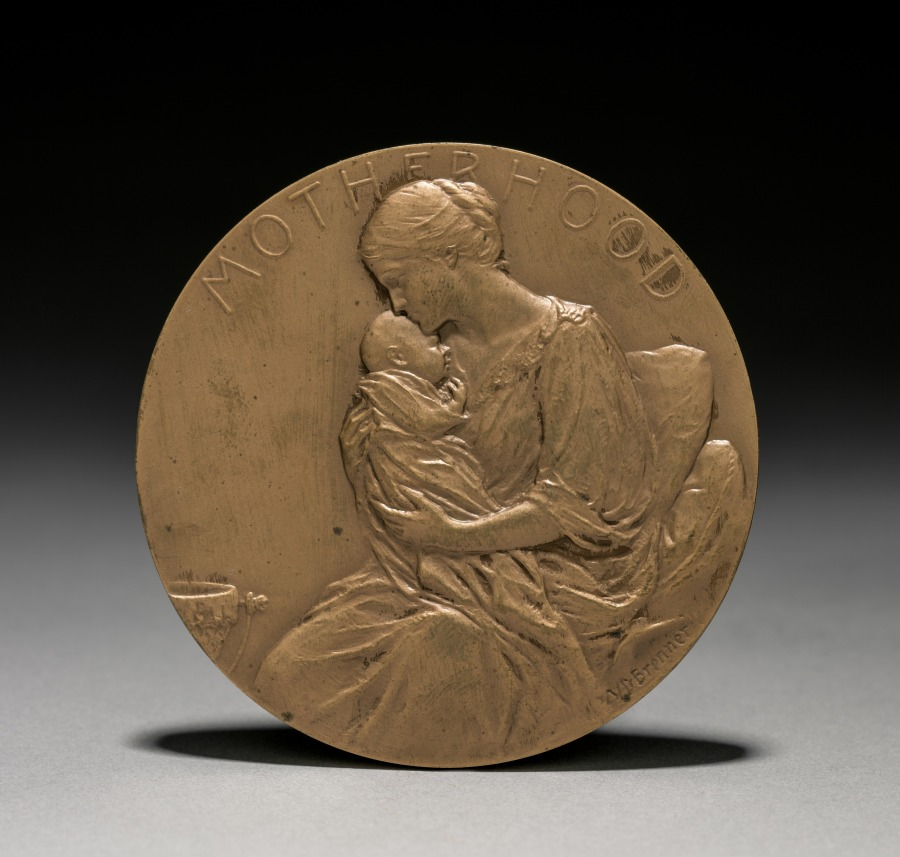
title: Medal: Motherhood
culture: America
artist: Victor D. Brenner (American, 1871–1924)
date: 1911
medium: bronze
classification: Metalwork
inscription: above: "MOTHERHOOD"; lower right: "VD Brenner."